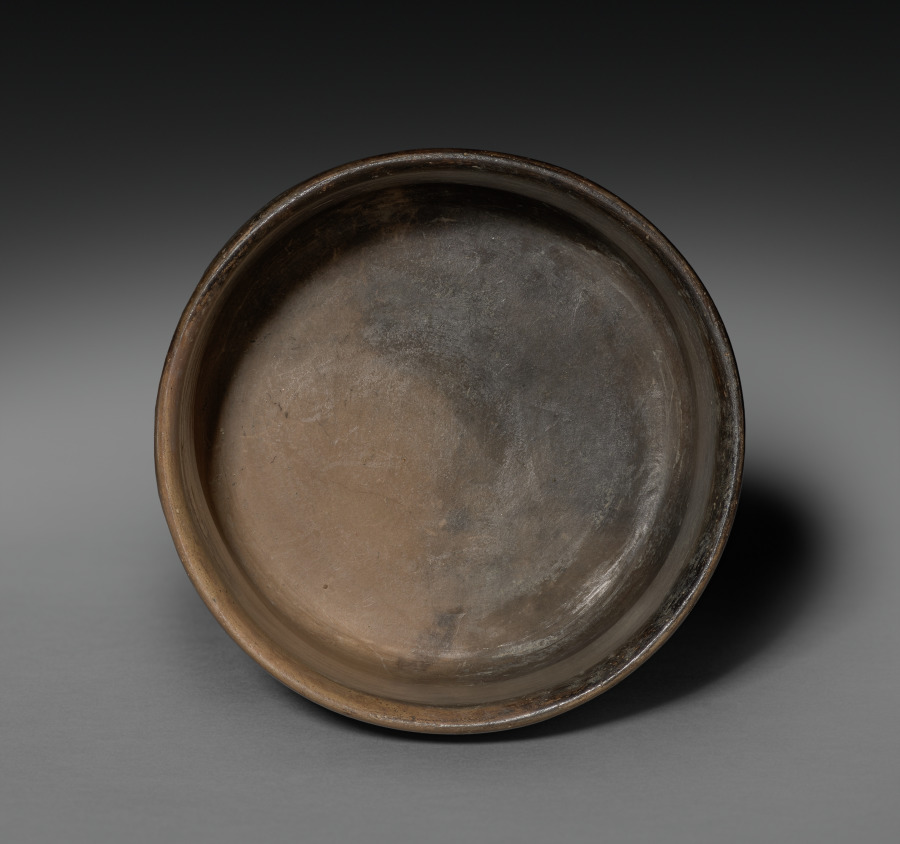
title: Tripod Vessel with Lid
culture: Mexico or Central America, Maya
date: 250–600 CE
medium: earthenware with pigment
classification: Ceramic